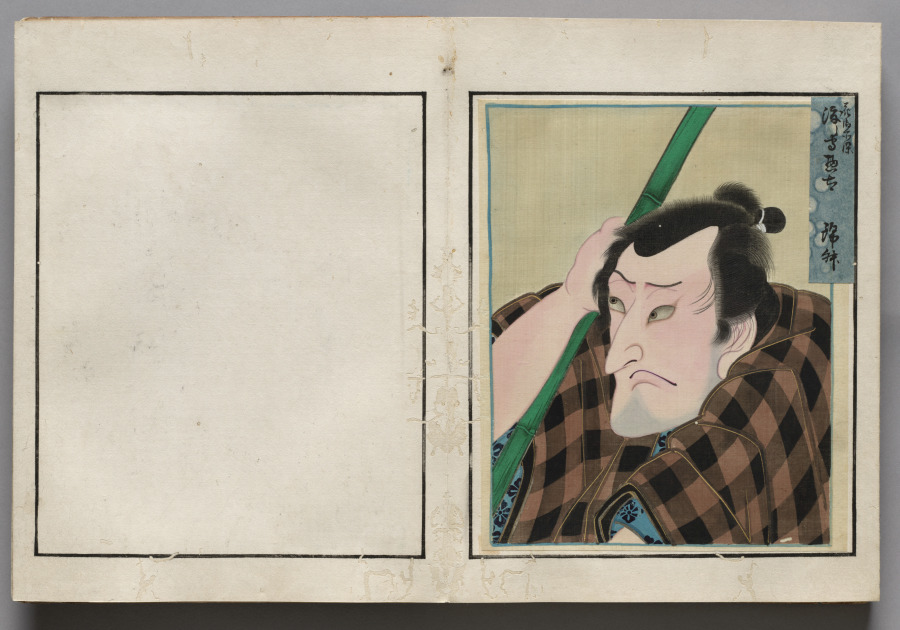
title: Double-Leaf from Album of Actor Portraits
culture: Japan, Edo period (1615–1868)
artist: Shōrakusai (Japanese)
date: c. 1790–1810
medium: double-leaf from an accordion-style album; ink and color on silk (right)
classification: Bound Volume